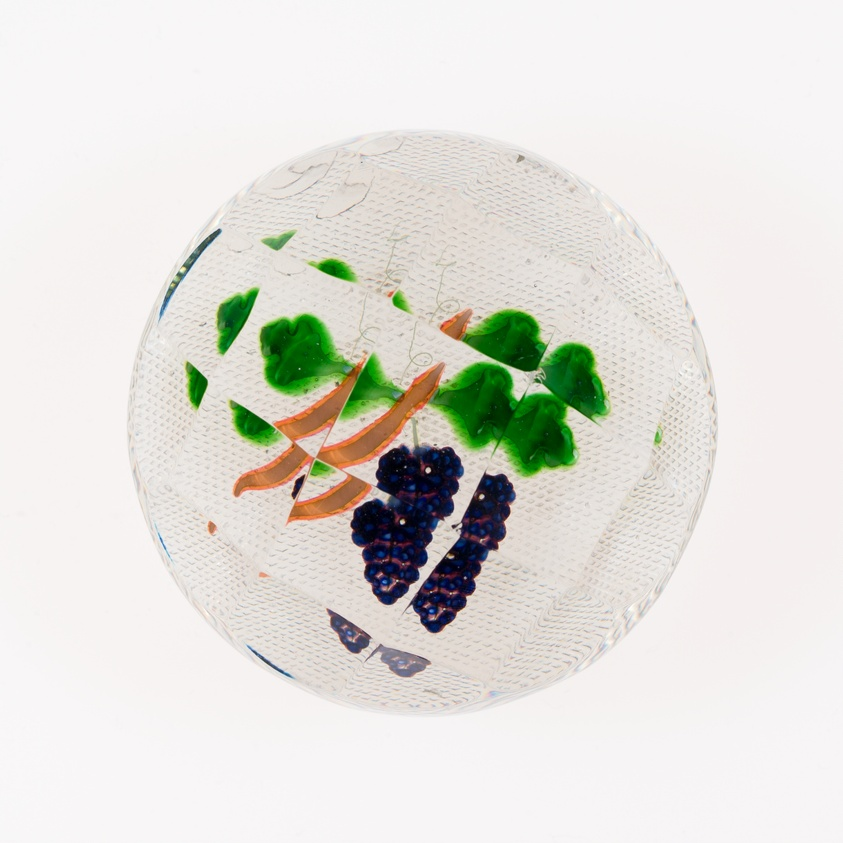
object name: Glass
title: Paperweight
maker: Saint-Louis Glassworks (Cristalleries de Saint-Louis); Lorraine, France, founded 1586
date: 19th century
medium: Glass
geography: Saint-Louis-lès-Bitche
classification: paperweight; lampwork; european decorative arts; glass